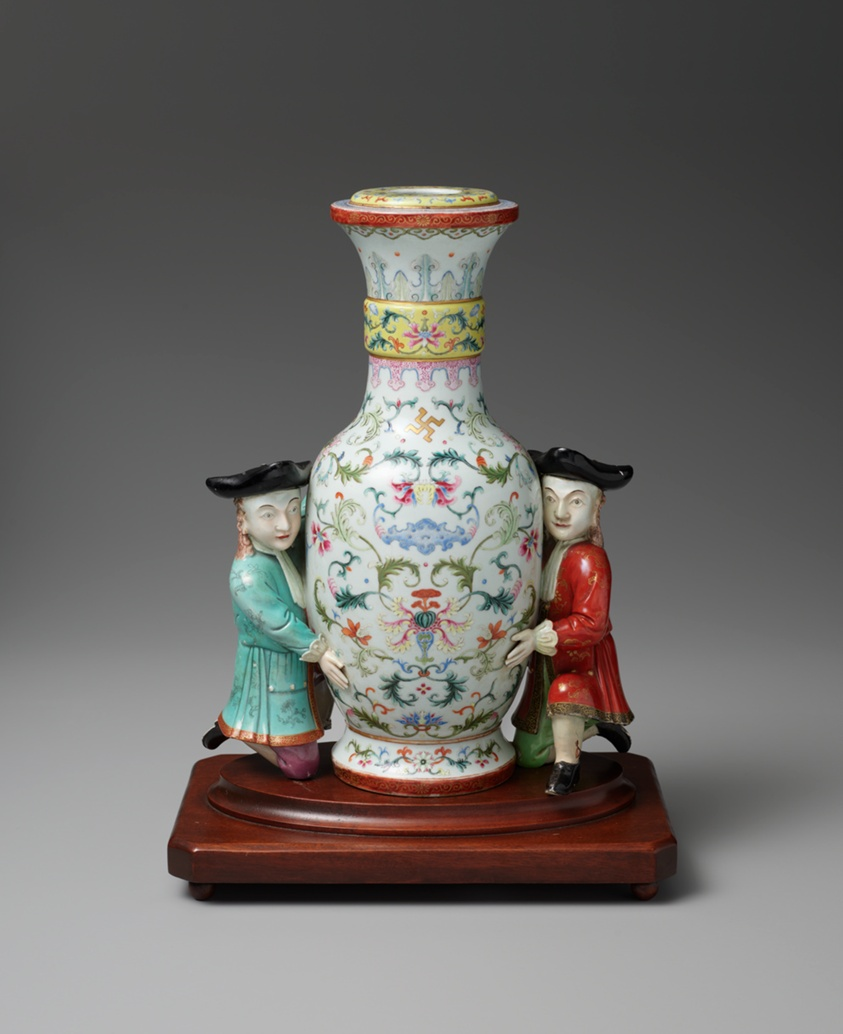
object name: Ceramics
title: Vase with European Figures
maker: China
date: second half of the 18th century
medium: Porcelain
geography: China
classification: vase; european decorative arts; porcelain